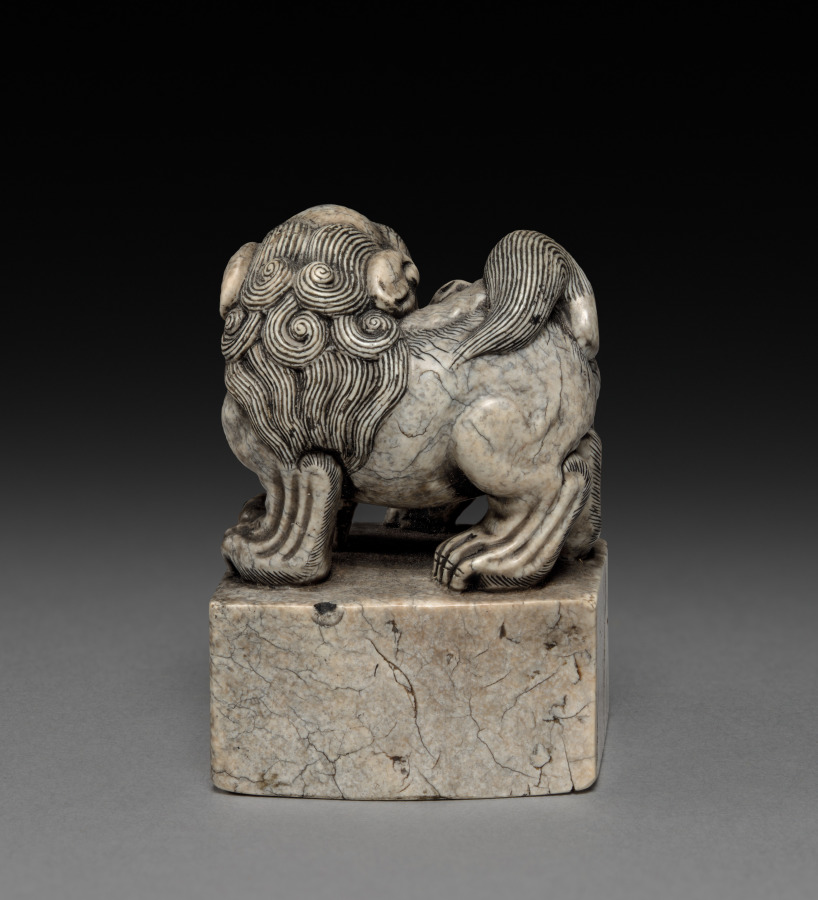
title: Seal: Lion and Cub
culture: China, Qing dynasty (1644-1911)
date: 1700s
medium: stone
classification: Stone